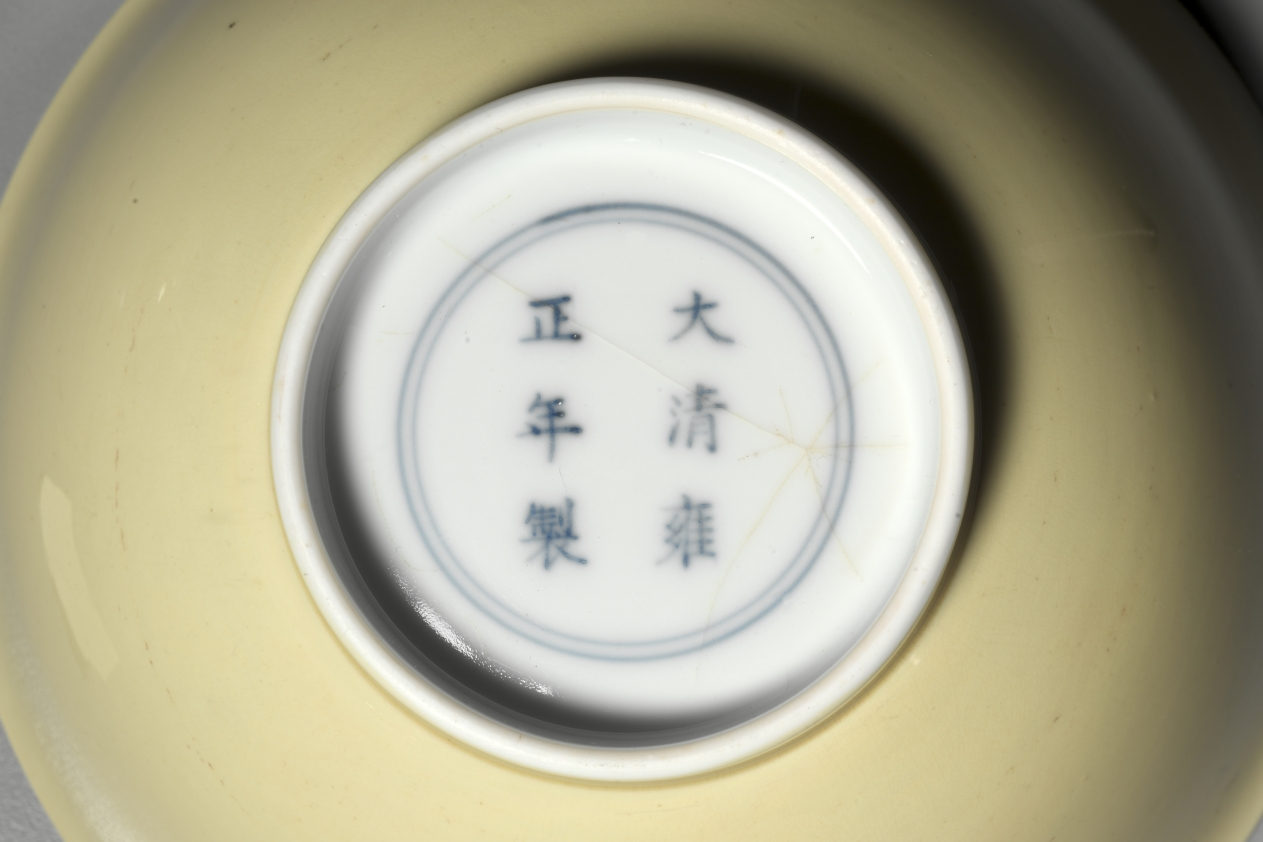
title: Bowl with Yellow Glaze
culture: China, Qing dynasty (1644-1911), Yongzheng mark and reign (1723-35)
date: 1723–1735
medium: glazed porcelain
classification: Ceramic